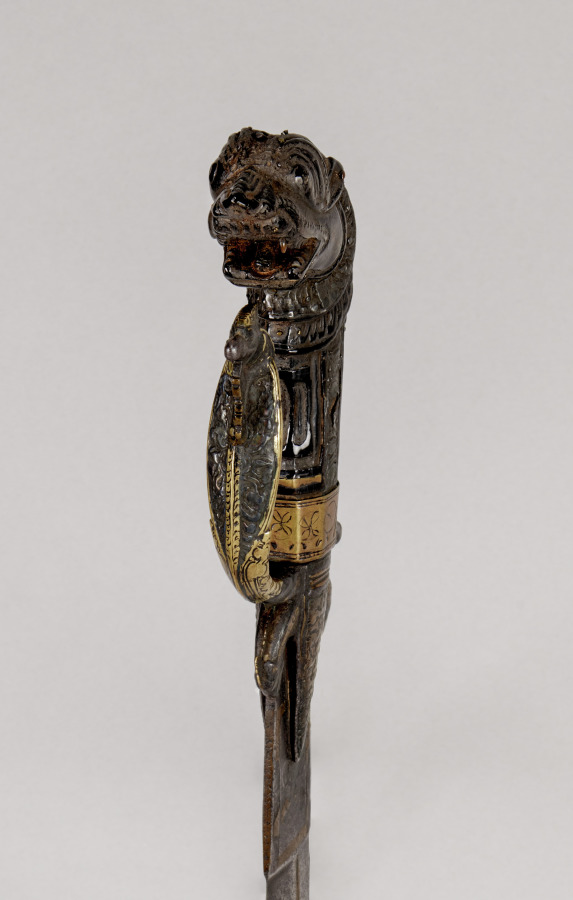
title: Sword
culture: Sri Lanka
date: c. 1800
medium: Blade: steel; hilt: wood with repoussé silver inlay and bronze fittings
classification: Arms and Armor